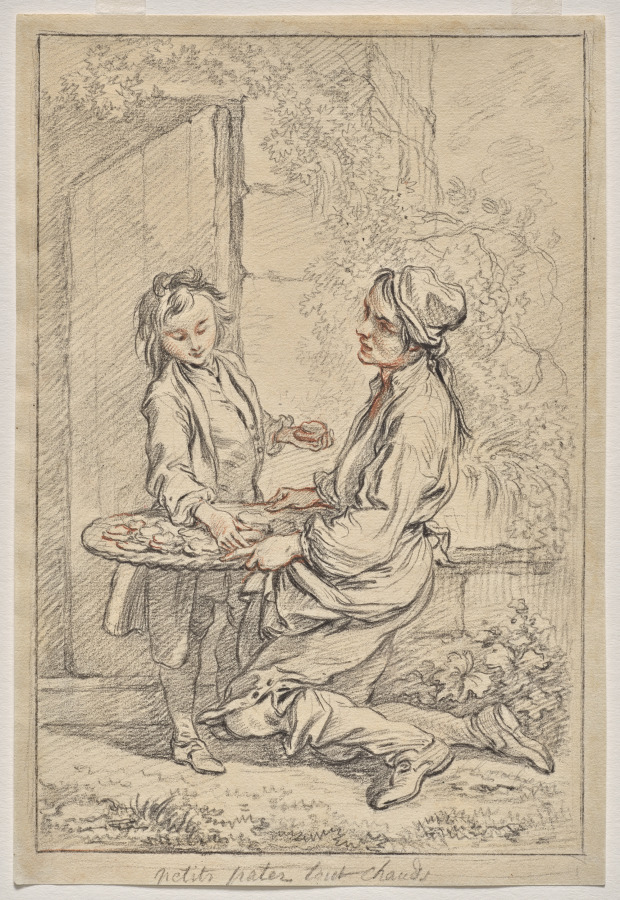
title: Pastries, Talmouses, All Hot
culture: France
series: The Cries of Paris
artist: François Boucher (French, 1703–1770)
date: c. 1737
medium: black and red chalks on paper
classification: Drawing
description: François Boucher made the drawing as a print design for a series depicting Parisian tradespeople, titled the Cris de Paris (Criers of Paris), which consisted of 12 plates. Subjects in the series included this vendor of hot pastries and cheese puffs as well as a variety of other vendors such as a knife grinder, broom seller, chimney sweep, and vegetable seller. Boucher was known primarily for images epitomizing the elegant court life of France—nudes, decorative compositions, and pastorals—rather than so-called “low life” subjects such as street vendors. Boucher’s series struck a chord with the growing middle-class print-buying public in France, with its designs migrating to a variety of decorative arts and porcelain figurines.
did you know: Despite its subject of a street vendor, Boucher’s composition retains some of the courtly artificiality of his age, with an elegantly dressed young gentleman and unkempt baker’s apprentice whose pose is nonetheless balletic, like a dancer at a courtly fête.